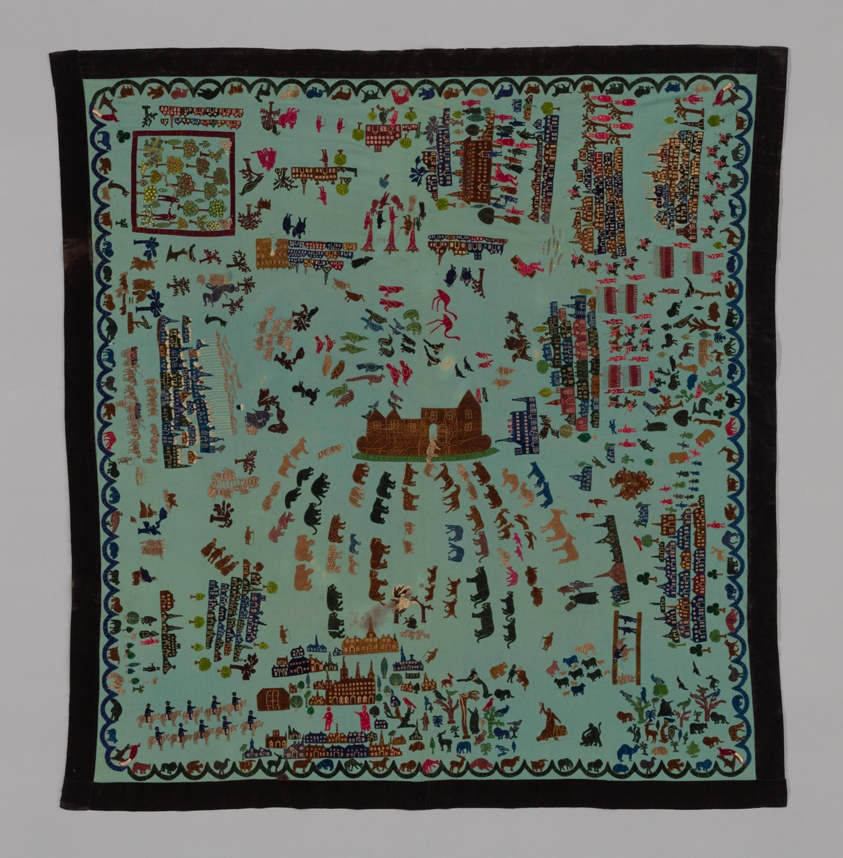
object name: Textile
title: Bedcover Depicting Thirty-four Scenes from the Old and New Testaments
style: Folk Art, 19th century, American Arts and Crafts Movement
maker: United States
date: 1880s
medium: Wool, plain weave; fulled; appliquéd with silk and cotton, plain weave with supplementary pile warps forming cut solid velvet; some stamped; some embroidered with silk yarns in cross, overcast, running, double running, satin, and single satin stitches; couching; edged with silk, plain weave with supplementary pile warps forming cut solid velvet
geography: United States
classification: textile; needlework - quilt; bedcover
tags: religious scenes, animals, dogs, Old Testament, New Testament